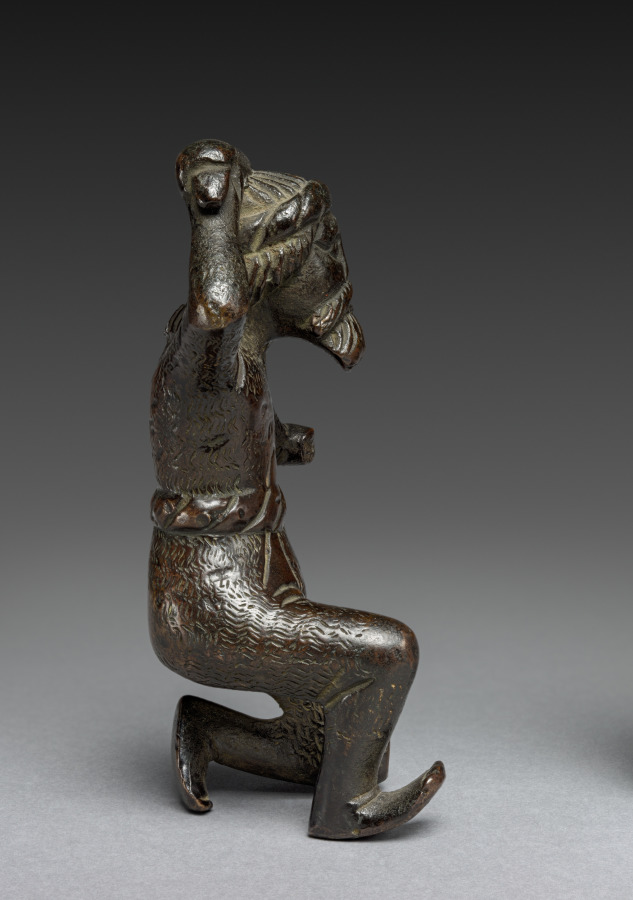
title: Wild Man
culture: Germany, Nuremberg(?)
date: late 1400s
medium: copper alloy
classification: Sculpture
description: Common in medieval art, the wild man is humanlike in appearance with long shaggy hair over his entire body and typically carries a club. Living at the fringe of society in woodland areas, wild men symbolized man in his natural, uncivilized state. Perhaps derived from the part-man part-beast satyr of antiquity, the wild man symbolized lust and aggression in contrast to the spiritual love embodied in medieval chivalry. This bearded version is shown kneeling while raising his right arm holding a club. He wears a twisted cloth circlet on his head and a similar belt at the waist. It has been suggested that this sculpture originally formed part of a suspended candelabra. It may also have served as support for large metal vessels.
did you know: The wild man is derived from the Greek satyr who lived in the woods.